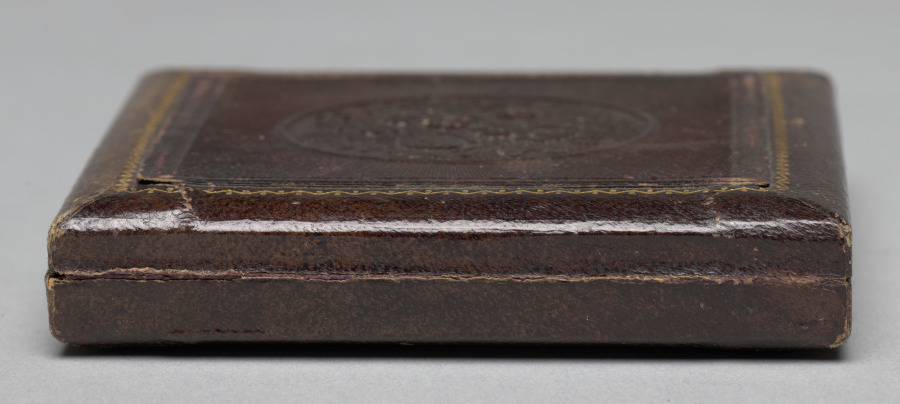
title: Hunter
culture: America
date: c. 1862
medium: daguerreotype, sixth plate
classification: Photograph